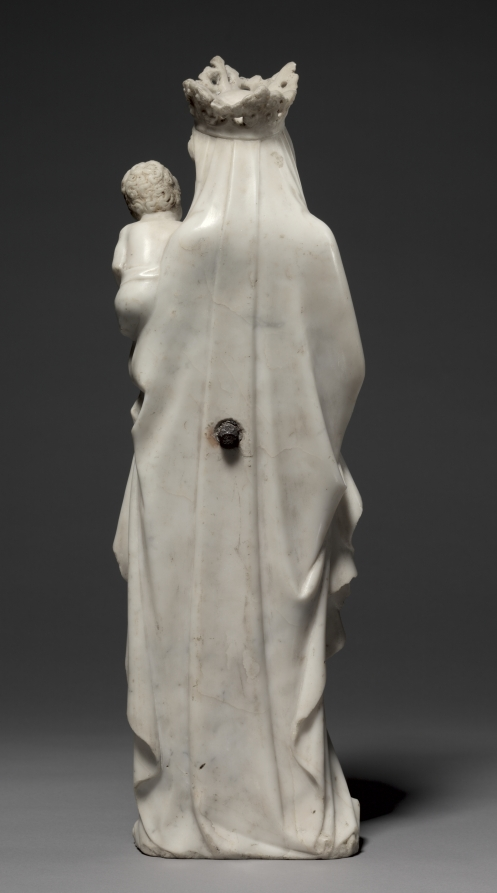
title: Virgin and Child with a Bird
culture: France, Île-de-France, Paris, 14th century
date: c. 1350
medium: marble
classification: Sculpture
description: The Virgin and Child represents one of the most frequent subjects for free-standing sculpture in 14th-century France, motivated by the developing cult of the Virgin and increasing veneration of Mary. Such sculptures were not restricted to churches, but were also found in roadside shrines, entrances to towns, and domestic use in private chapels. The small scale of this statuette suggests it was made for private veneration. The bird, held in the Virgin’s right hand, was a well-known symbol of the human soul and represents Christ’s role as redeemer of humankind.